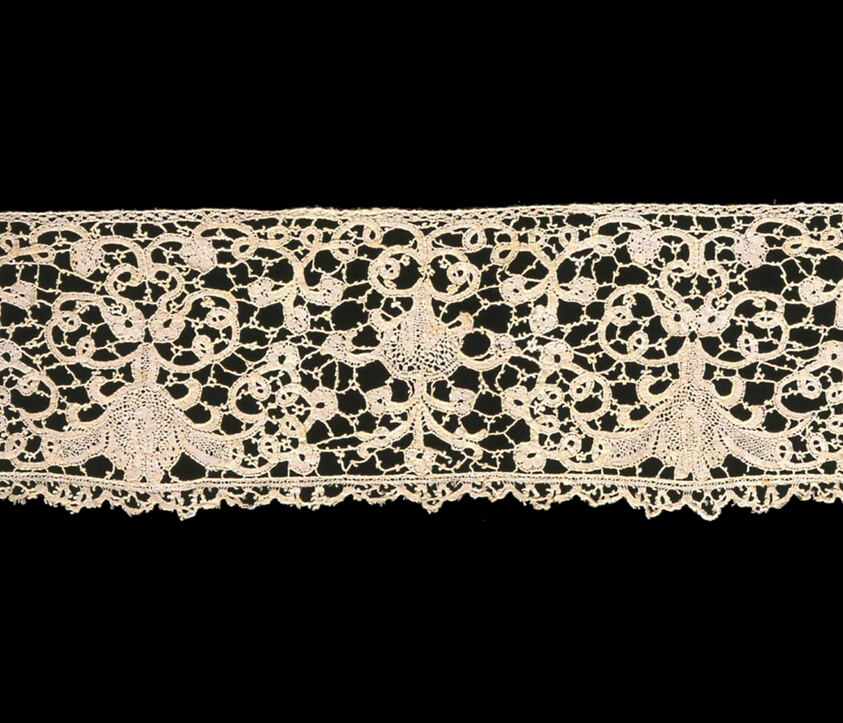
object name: Textile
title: Border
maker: Belgium, Flanders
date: 1675/1700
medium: Linen, bobbin part lace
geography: Flanders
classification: textile; lace - bobbin